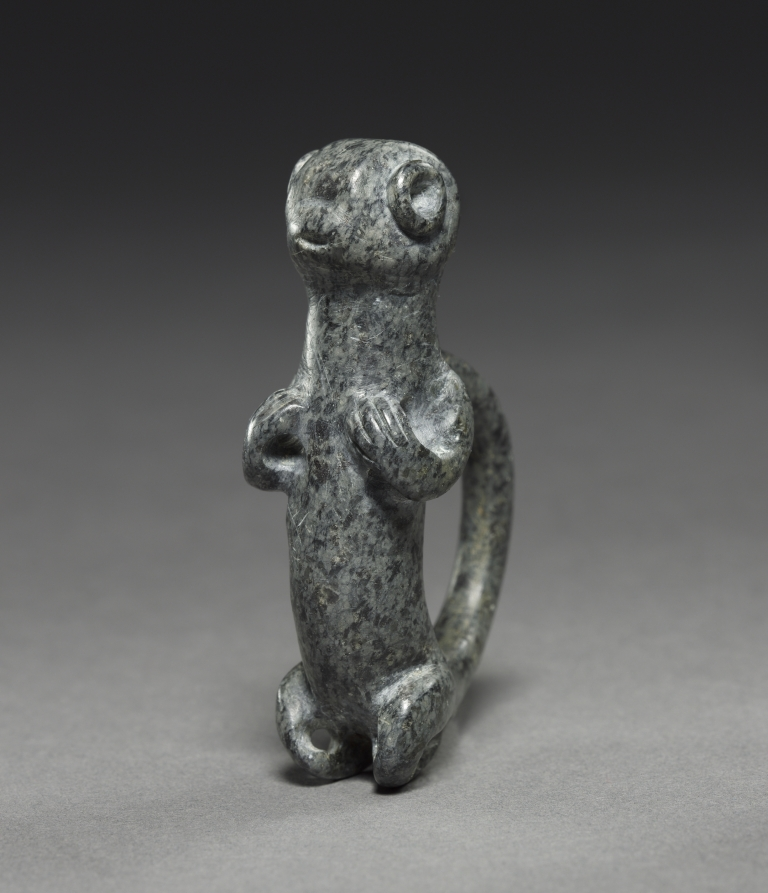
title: Monkey Pendant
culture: Panama, International Style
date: c. 400–900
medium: stone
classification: Sculpture